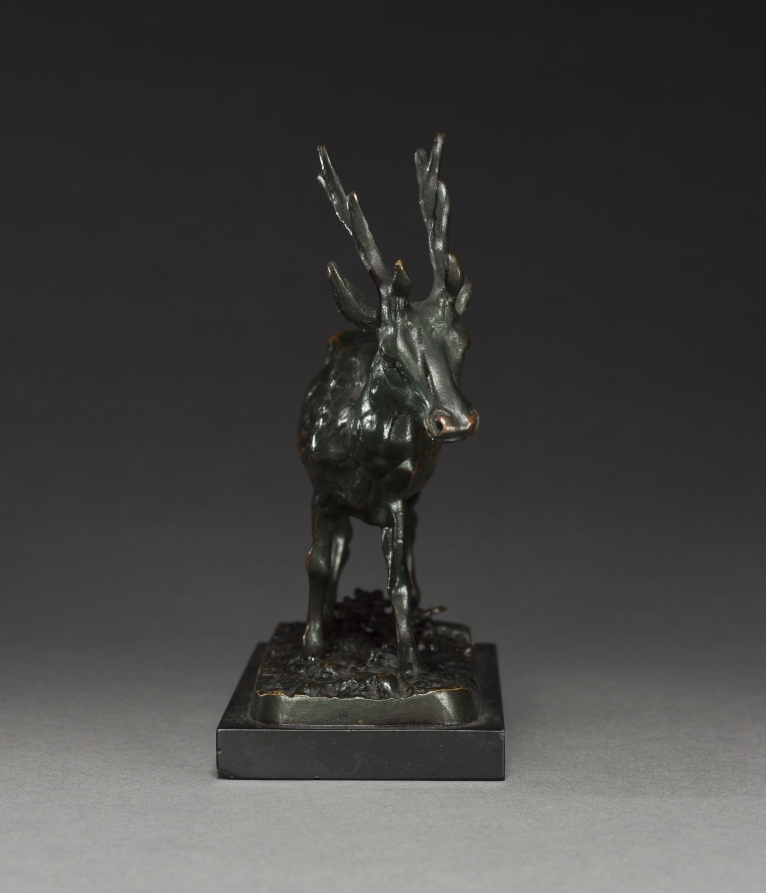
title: Deer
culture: France, 19th century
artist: imitator of Antoine-Louis Barye (French, 1796–1875)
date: after 1830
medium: bronze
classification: Sculpture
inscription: Signed: "Barye"